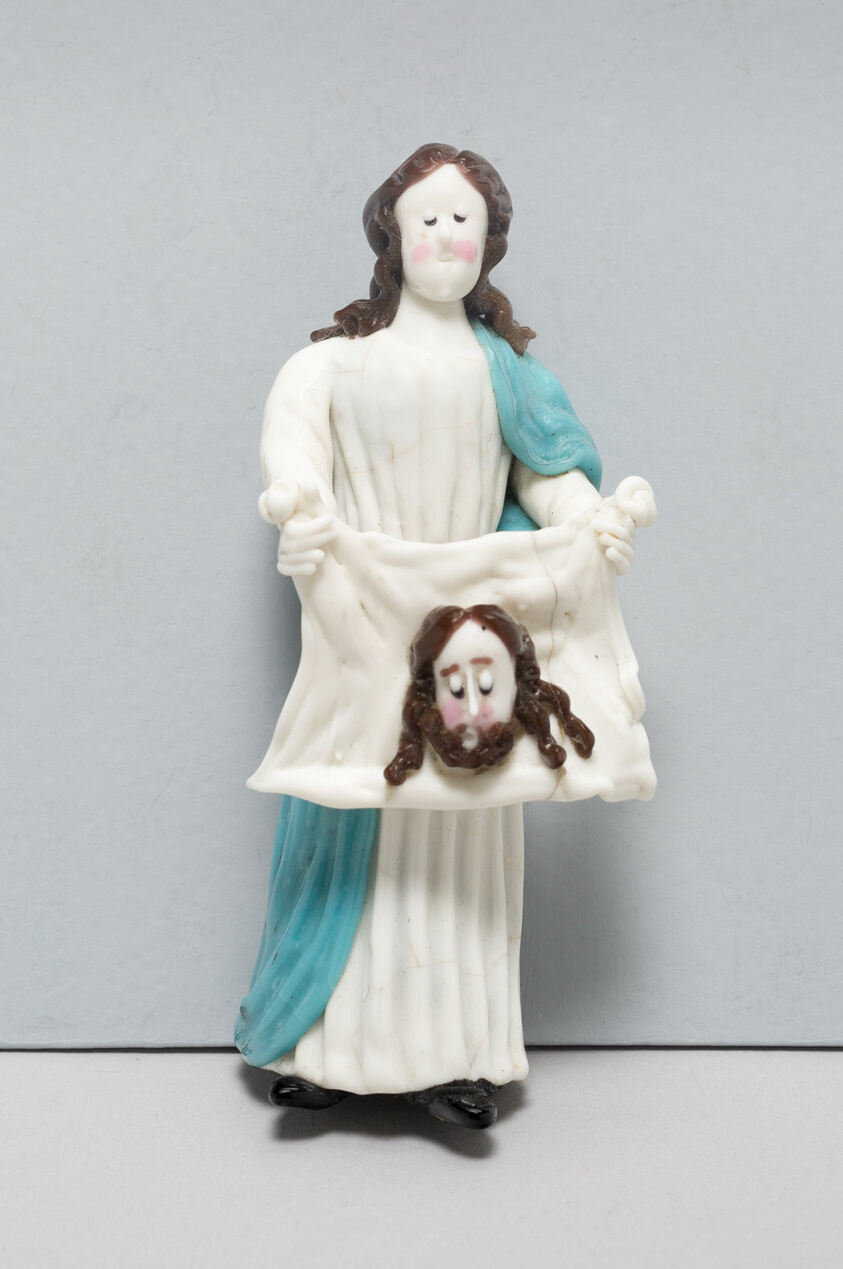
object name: Glass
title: St. Veronica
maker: Nevers, France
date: 1750/1800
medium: Glass; lampwork (verre de Nevers), metal armature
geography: France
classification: decorative object/ornament; lampwork; glass; european decorative arts